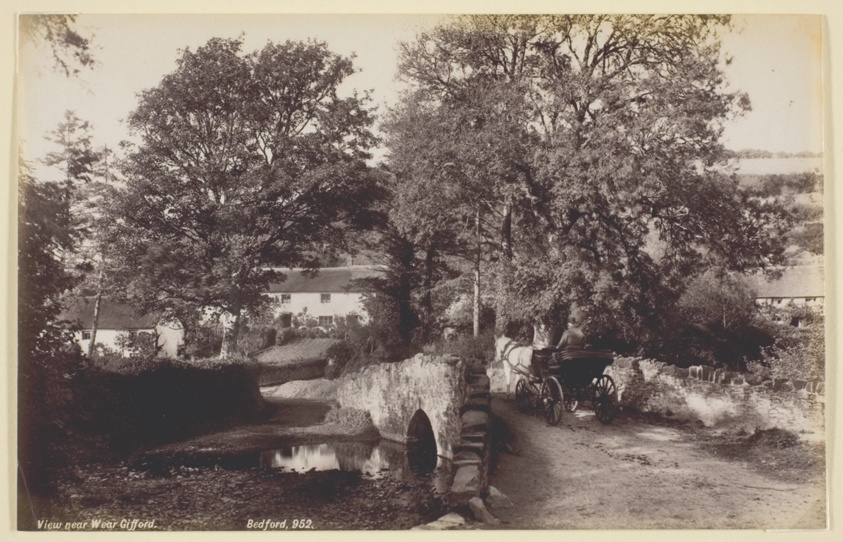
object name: Photograph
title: View near Wear Gifford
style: 19th century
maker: Francis Bedford (English, 1816–1894)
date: 1860/94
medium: Albumen print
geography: England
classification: albumen silver print; photographic process; photography; photograph